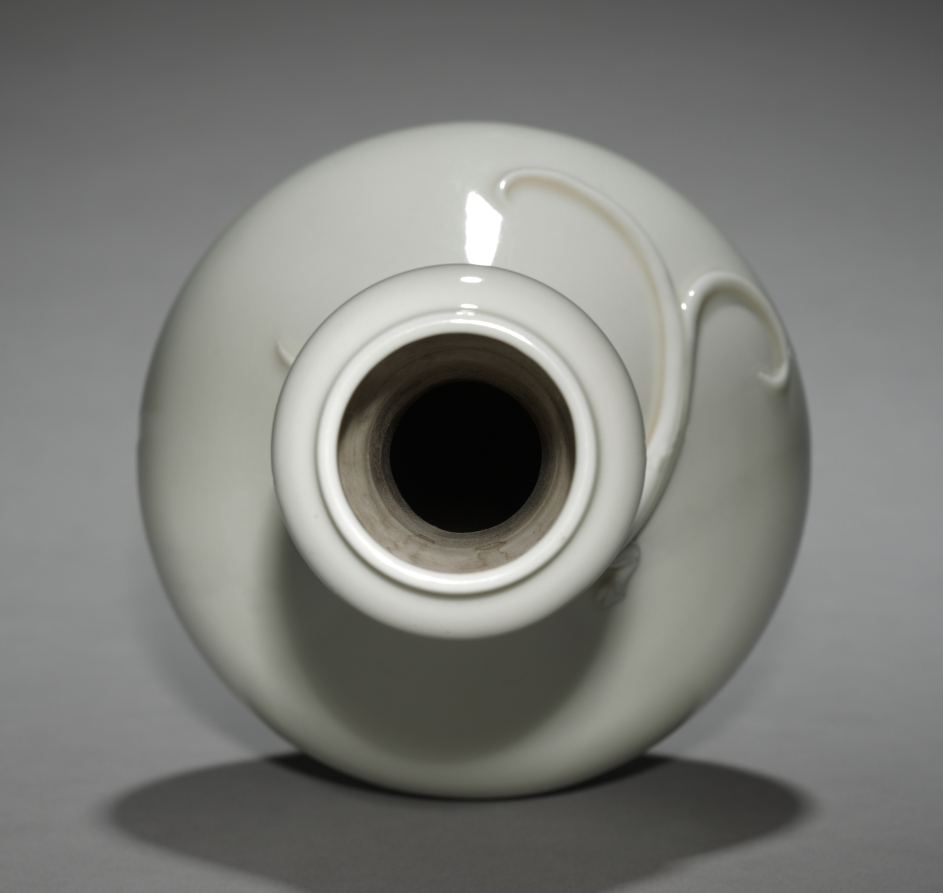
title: Bottle-shaped Vase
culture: China, Qing dynasty (1644-1911), Kangxi reign (1662-1722)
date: 1662–1722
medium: porcelain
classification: Ceramic